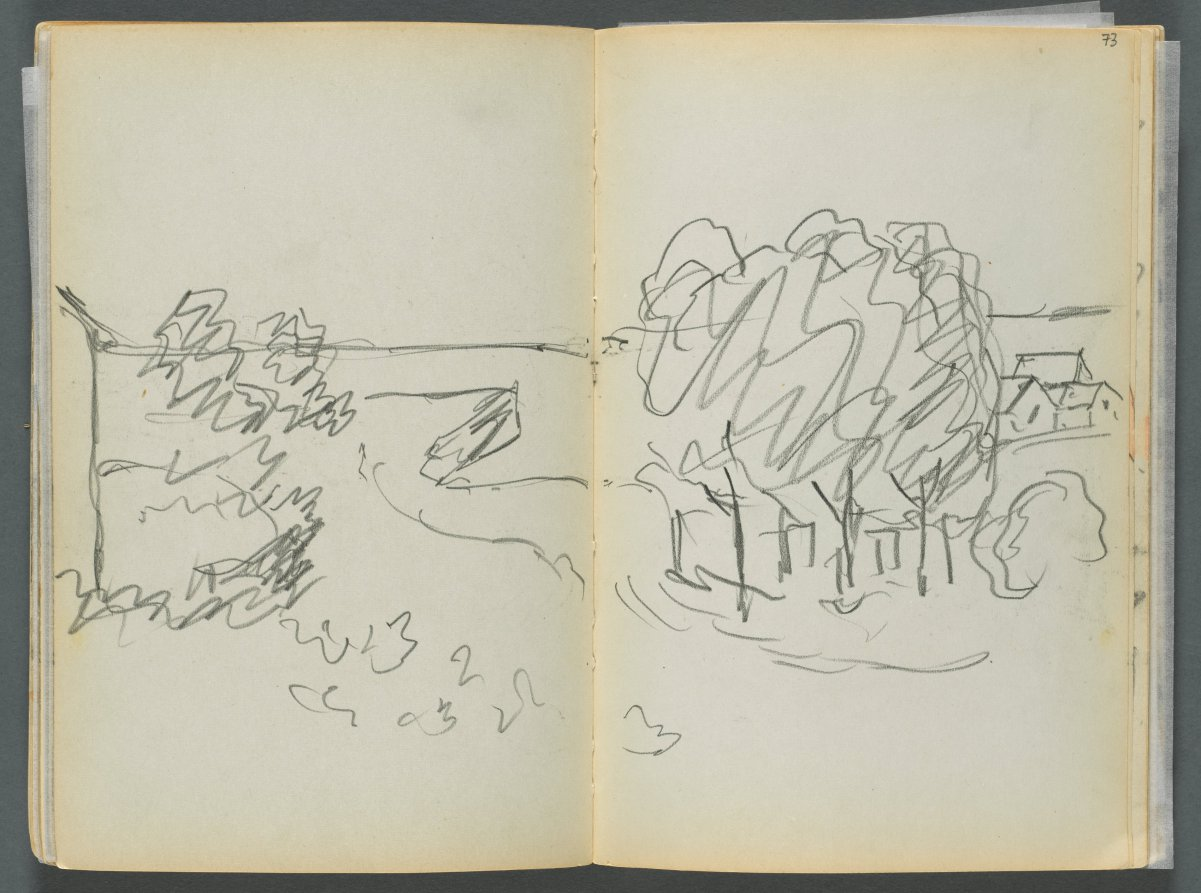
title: Sketchbook- The Granite Shore Hotel, Rockport, page 072 & 73: Town View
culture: America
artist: Maurice Prendergast (American, born Newfoundland [now Canada], 1858–1924)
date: 1905–10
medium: graphite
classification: Bound Volume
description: This sketchbook contains 72 pages of pencil drawings and 9 watercolors of Cape Ann. On the inside of the cover Prendergast wrote the address of the Granite Shore Hotel in Rockport, Massachusetts.